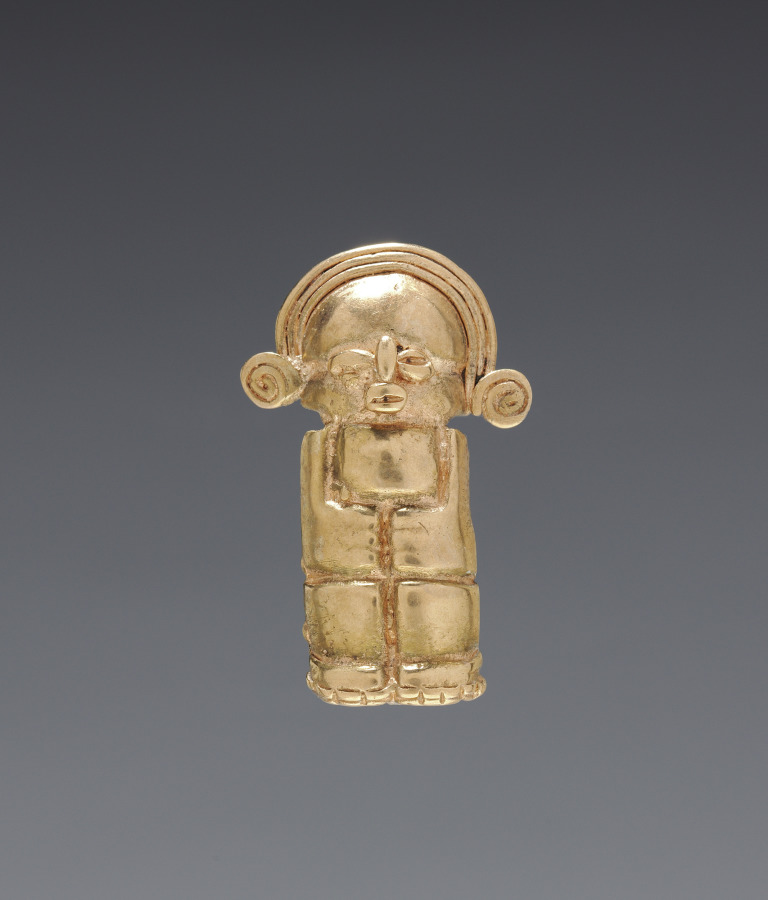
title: Necklace Figurine Bead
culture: Colombia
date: 1–700 CE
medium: cast gold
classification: Jewelry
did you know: Working with gold dates back to at least 500 BC in Ecuador and Colombia.